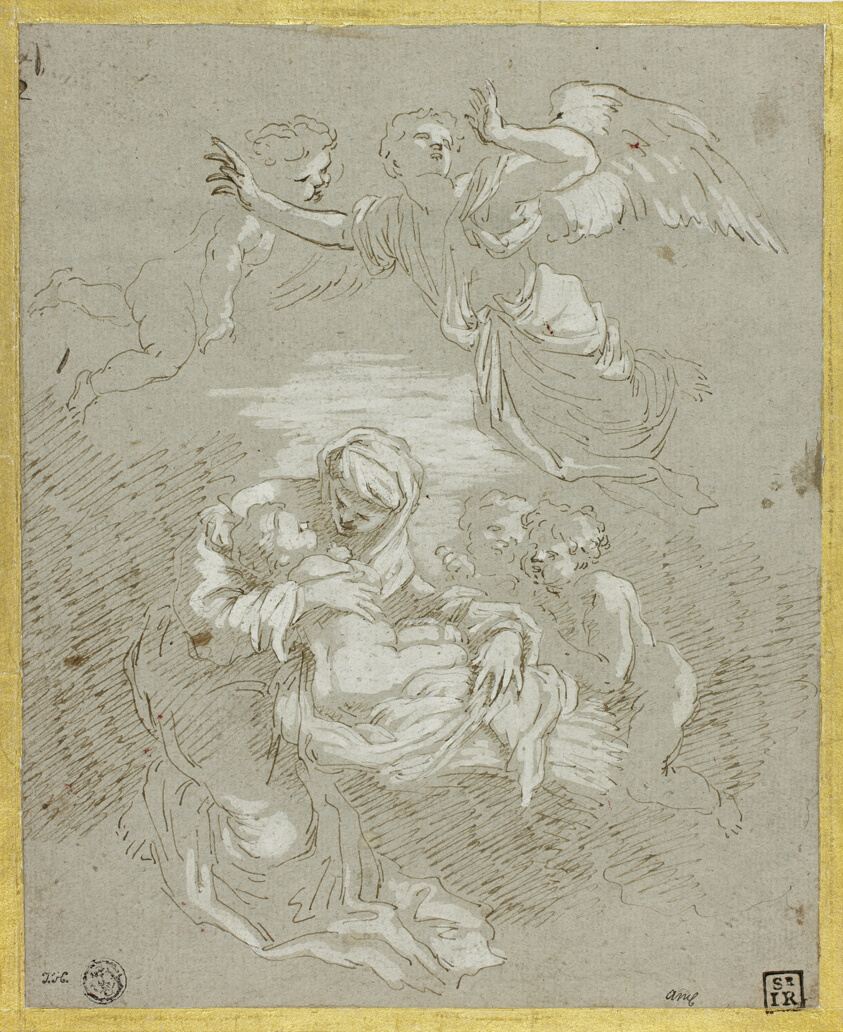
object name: Drawing and Watercolor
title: Madonna and Child with Angels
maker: Attributed to Johann Carl Loth (German, 1632-1698) or follower of; or possibly Paul von Strudel und Vochberg (Austrian, 1648-1708); or possibly after Giovanni Benedetto Castiglione (Italian, 1609-1664)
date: c. 1700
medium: Pen and brown ink, heightened with white gouache, on gray laid paper with blue fibers, laid down on ivory laid card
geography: Germany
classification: pen and ink drawings; drawings (visual works); prints and drawing